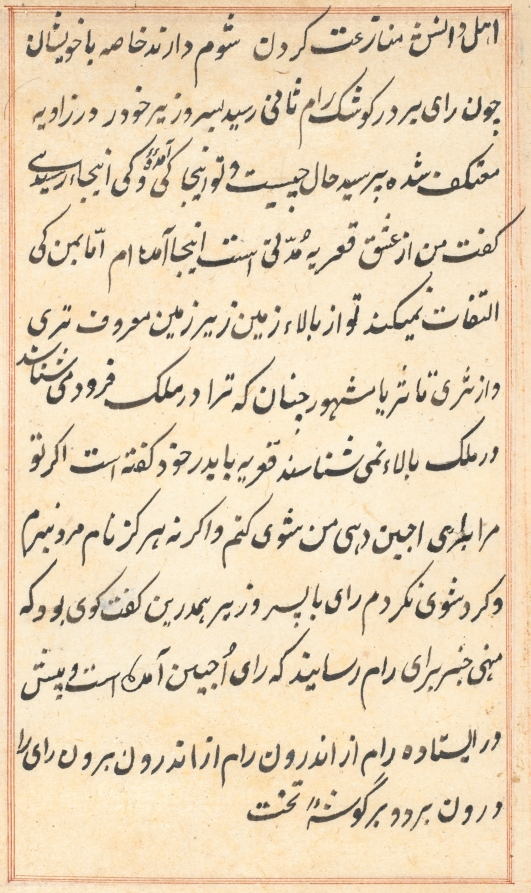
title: Page from Tales of a Parrot (Tuti-nama): text page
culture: Mughal India, court of Akbar (reigned 1556–1605)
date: c. 1560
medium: gum tempera, ink, and gold on paper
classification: Painting